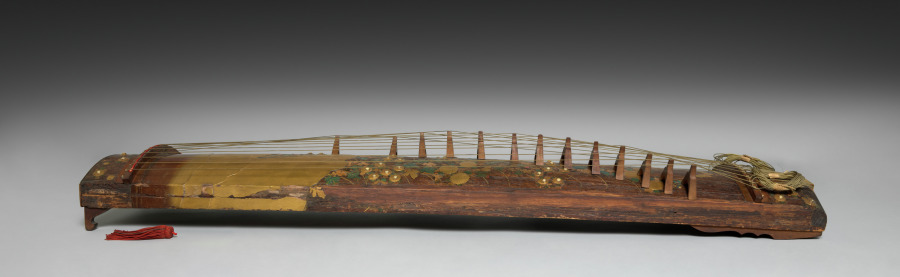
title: Koto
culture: Japan, Edo period (1615–1868)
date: early to mid-1800s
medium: Wood with colored lacquer, sprinkled gold powder (maki-e), glass, textile and cord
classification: Musical Instrument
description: This koto has an elaborately decorated surface, suggesting that it was meant to be admired as a decorative object rather than played as a musical instrument. The vertical design shows a profusion of chrysanthemum and miscanthus grass above a brushwood fence as well as a pair of butterflies.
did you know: The koto descended from the guzheng, a Chinese zither first imported to Japan in the seventh century.